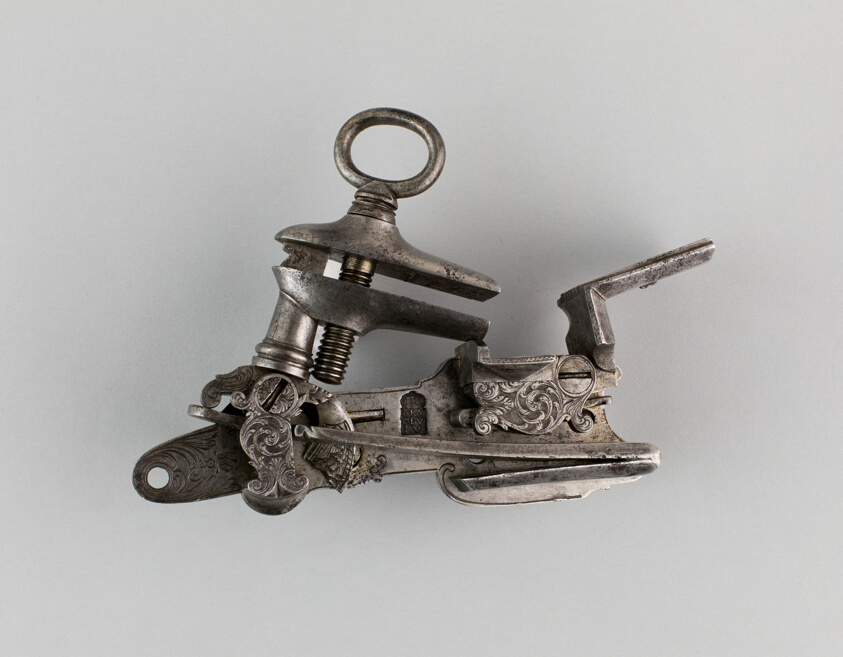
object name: Arms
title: Miguelet Gunlock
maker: Spanish; Ripoll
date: 1740/1760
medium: Steel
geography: Europe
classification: firearm-accessory; arms; arms and armor